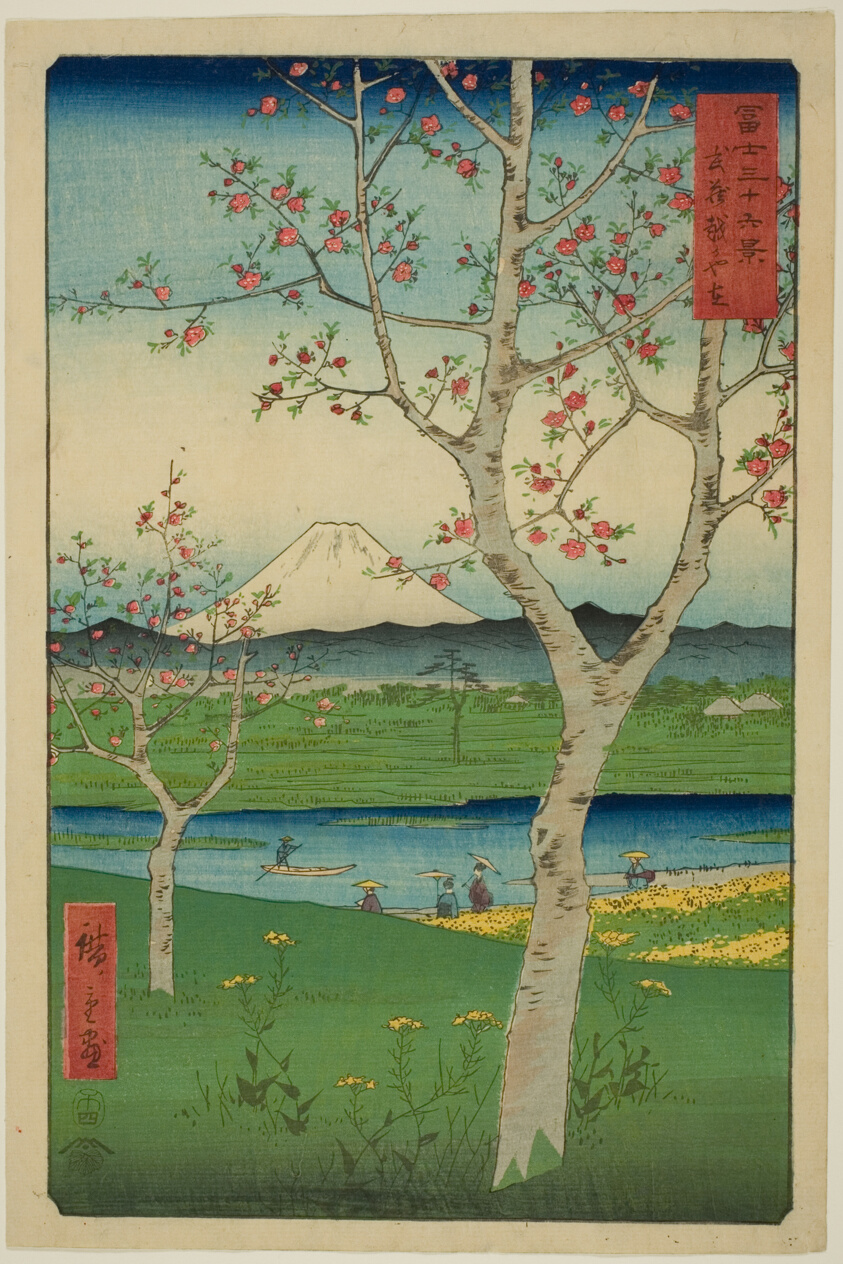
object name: Print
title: The Outskirts of Koshigaya in Musashi Province (Musashi Koshigaya zai), from the series "Thirty-six Views of Mount Fuji (Fuji sanjurokkei)"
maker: Utagawa Hiroshige 歌川 広重; Japanese, 1797-1858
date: 1858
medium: Color woodblock print; oban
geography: Japan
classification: woodblock print; print; asian art